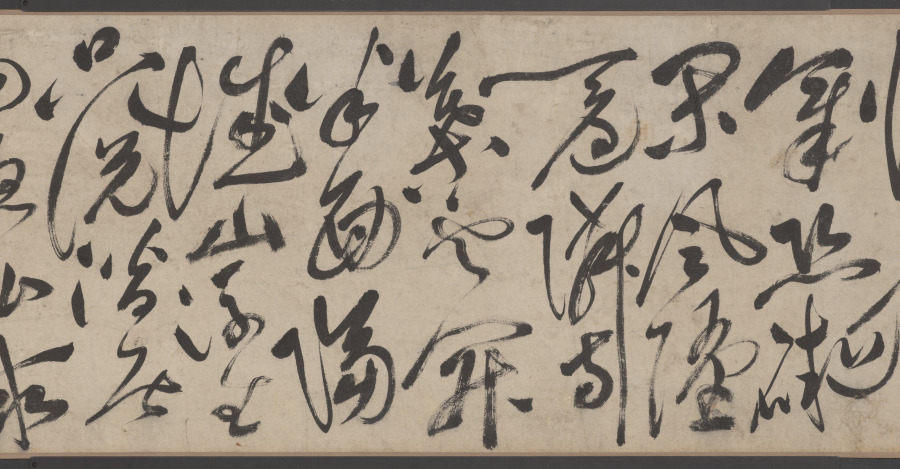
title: Retreat on an Autumn Day, in Cursive Script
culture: China, Ming dynasty (1368–1644)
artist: Zhu Yunming (Chinese, 1460–1527)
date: dated 1523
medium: Handscroll; ink on paper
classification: Calligraphy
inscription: 款識：讌於從一堂，爛漫醉書。癸未（1523）七月晦日也。枝山允明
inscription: 《閒居秋日》逃暑應能蹔閉關，未消多把古賢攀。並拋杯酌方為懶，少事篇章恐礙閑。風墮一庭鄰寺葉，雲開半面隔城山。浮生只說潛居易，隱比求（脫「名」）事更艱。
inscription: 《句曲道中》老至誰憐晝錦明，春來聊得客襟清。宵依星斗宮壇臥，曉（脫「入」）神仙宅舍行。眼看山多城郭少，肩挑詩重簿書輕。何時總入煙霞去。不見人間寵辱驚。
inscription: 《登茆峰》下馬門前一振衣，翠微高迥逼清微。雲端洞裡仙人過，月下山中長史歸。金焰暈牀砂氣伏，紫雲穿竇朮芽肥。神方能詠不能遇，一夜爽靈峰外飛。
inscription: 鈐印：「晞哲」、「允明」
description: This masterwork of calligraphy by Zhu Yunming from Suzhou combines two poems by the artist in cursive script style, characterized by its uninhibited, swift, and intuitive brushwork, so powerful that it here dissolved characters into dots or lines. Written from right to left and top to bottom and alternating in light dry to deep saturated ink, single characters may take a whole column or extend into the next one. Following the movement of the brush, they seem to dance over the paper.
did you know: Zhu Yunming stated that he was in an inebriated state when he created this work.